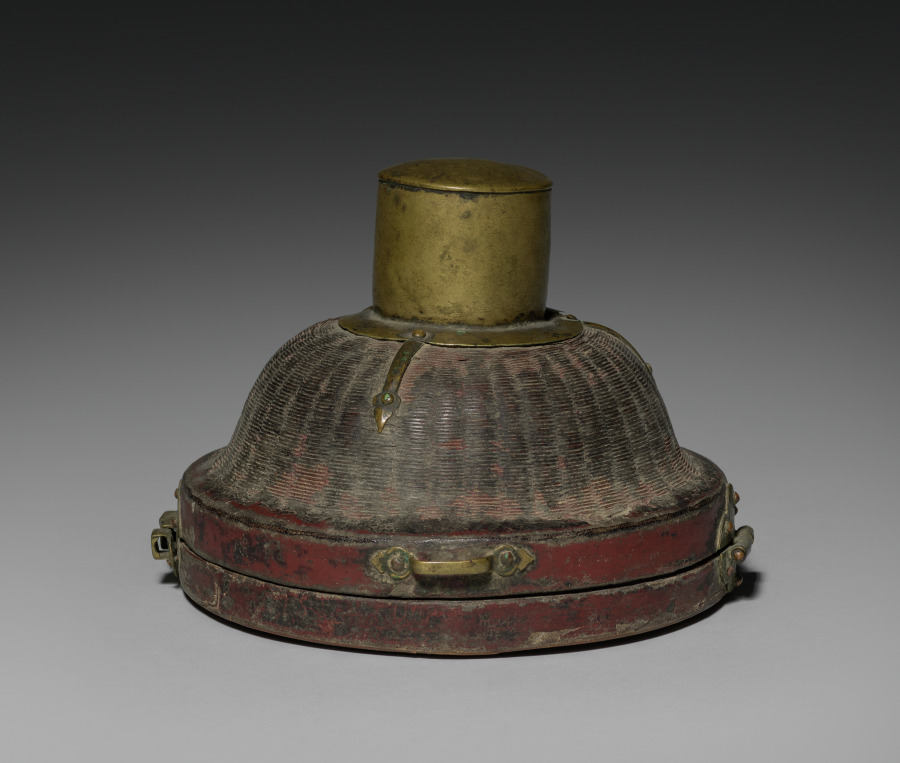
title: Stem Cup with Buddhist Emblems (case)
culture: China, Yuan dynasty (1271-1368)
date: 1300s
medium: wicker and wood with metal fittings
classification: Miscellaneous